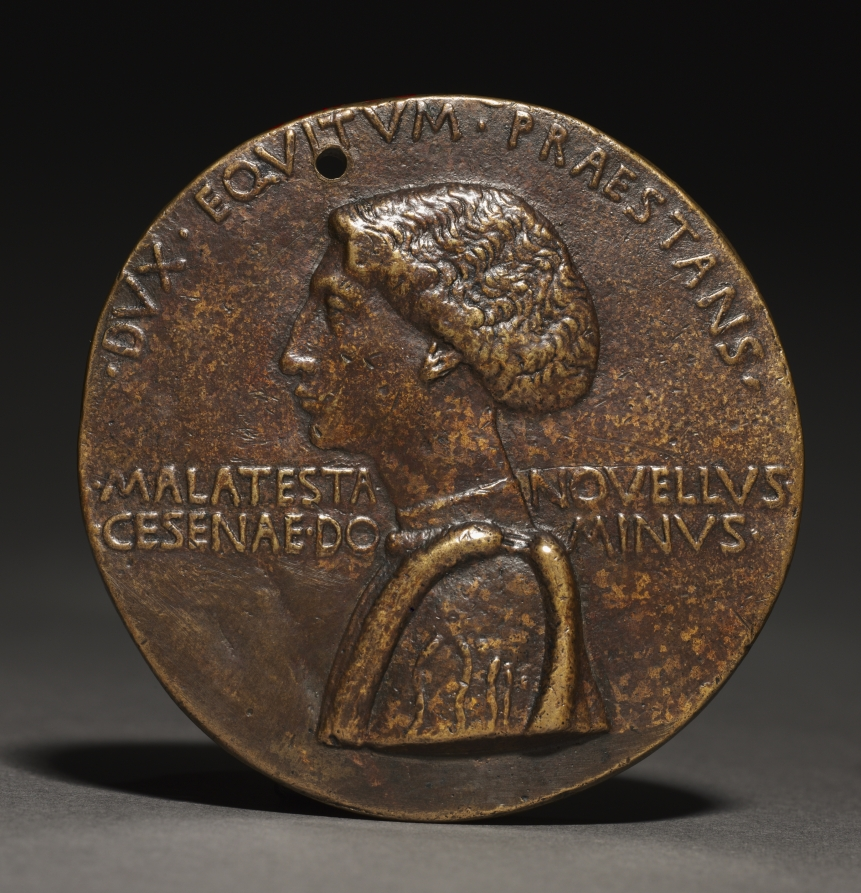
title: Portrait Medal of Domenico Novello Malatesta (obverse)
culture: Italy, 15th century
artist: Pisanello (Italian, Ferrara, c. 1395–1455)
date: c. 1445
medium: bronze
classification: Sculpture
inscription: obverse: DVX EQVITVM PRAESTANS; across: MALATESTA NOVELLVS CESNAE DOMINVS.